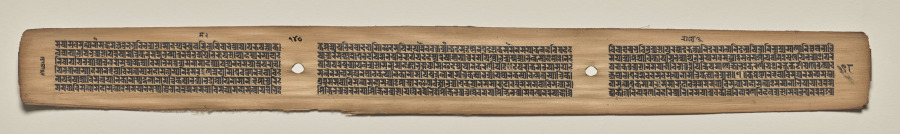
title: Text, Folio 148 (verso), from a Manuscript of the Perfection of Wisdom in Eight Thousand Lines (Ashtasahasrika Prajnaparamita-sutra)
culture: Eastern India, Bihar, Vikramashila Monastery. Painting: Nepal, Kathmandu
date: Sunday, September 14, 1119 (year 239 of the Newar Samvat in the month of Ashvina)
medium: gum tempera and ink on palm leaves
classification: Painting